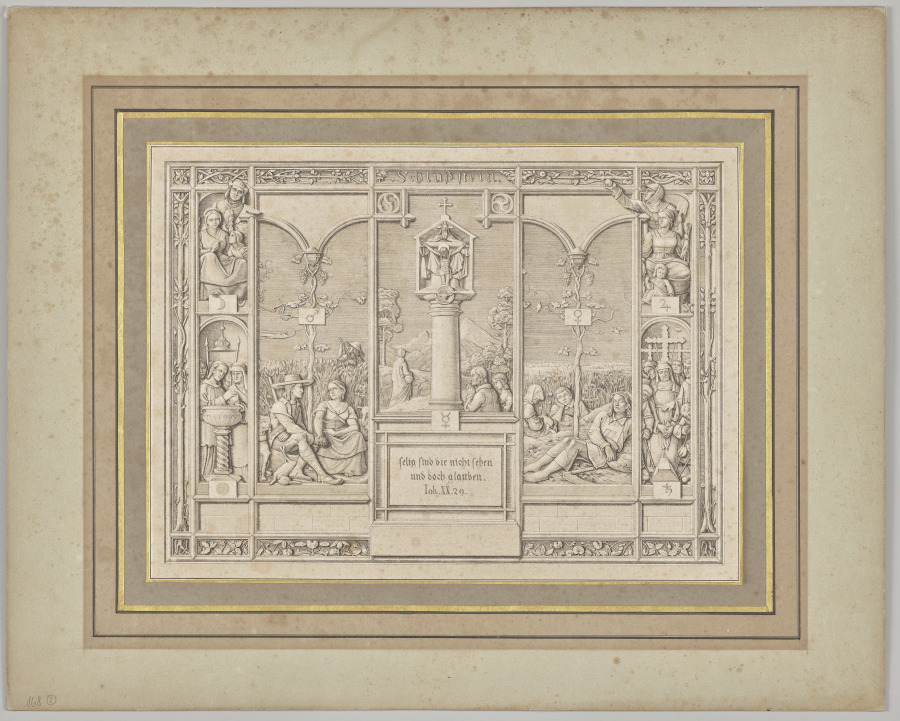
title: Capstone. John XX, 29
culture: Germany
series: Seven Areas from Salzburg and Berchtesgaden. Arranged according to the seven days of the week, connected by two allegorical sheets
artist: Ferdinand Olivier (German, 1785–1841)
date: 1818–23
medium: lithograph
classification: Print